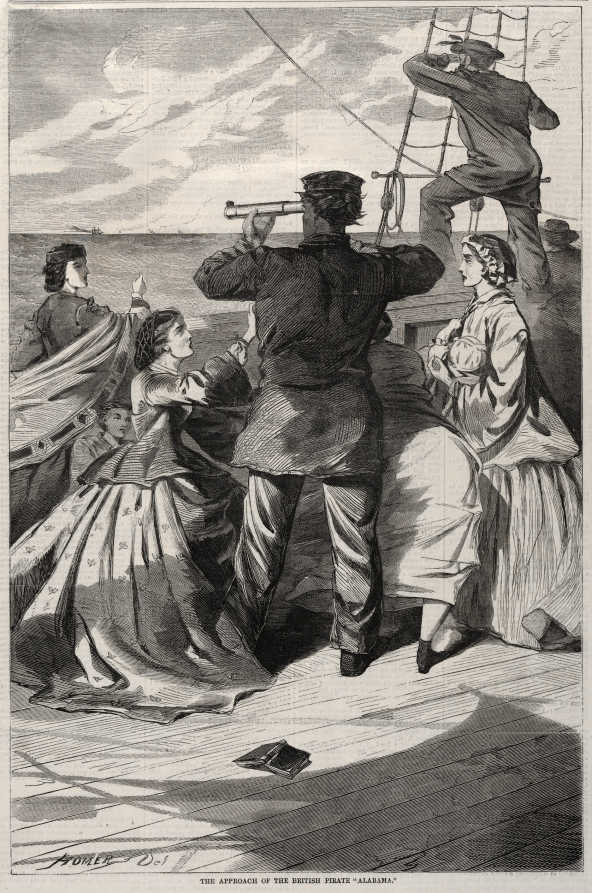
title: The Approach of the British Pirate "Alabama"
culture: America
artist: Winslow Homer (American, 1836–1910)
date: 1863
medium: wood engraving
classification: Print